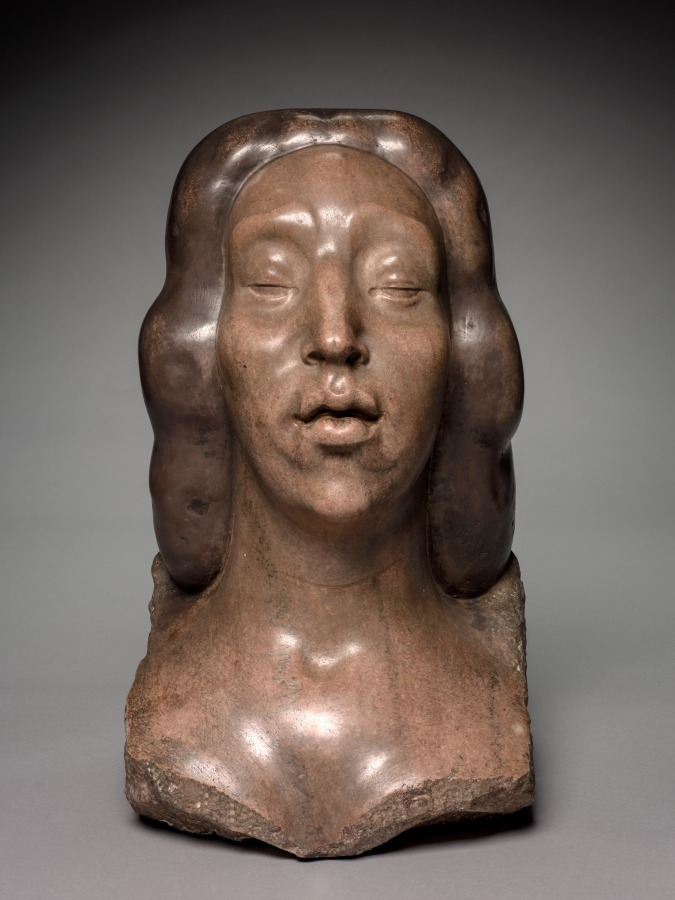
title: Head of Woman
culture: America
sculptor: Gaston Lachaise (American, born France, 1882–1935)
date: 1920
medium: pink Tennessee marble and black pigment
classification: Sculpture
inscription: Signed on base: G. LACHAISE 1923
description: Gaston Lachaise acknowledged that his wife, Isabel Dutaud Nagel Lachaise, was "the primary inspiration which awakened my vision and the leading influence that has directed my forces." Head of a Woman is one of several sculpted portraits he made of her.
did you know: Born in Paris, France, Gaston Lachaise immigrated to the United States in 1906.